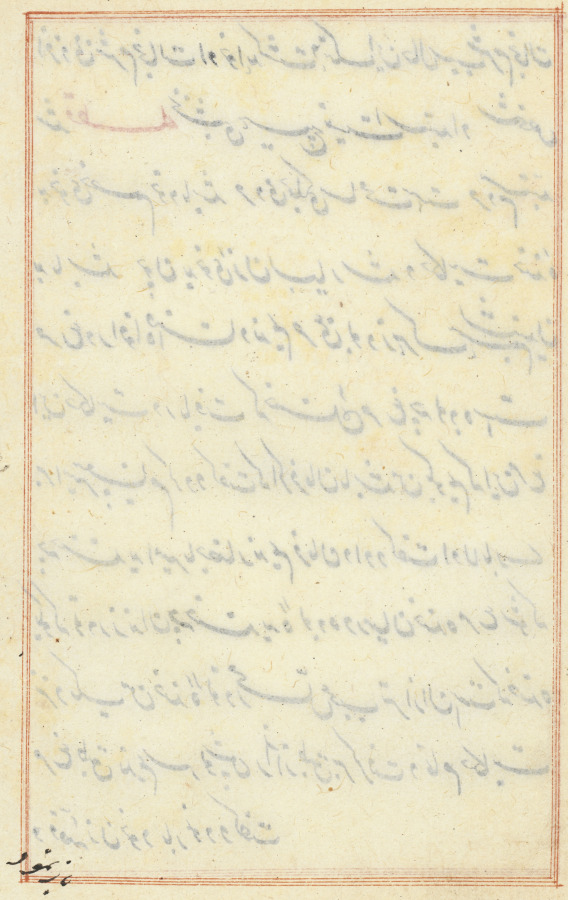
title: Page from Tales of a Parrot (Tuti-nama): text page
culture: Mughal India, court of Akbar (reigned 1556–1605)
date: c. 1517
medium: gum tempera, ink, and gold on paper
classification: Painting